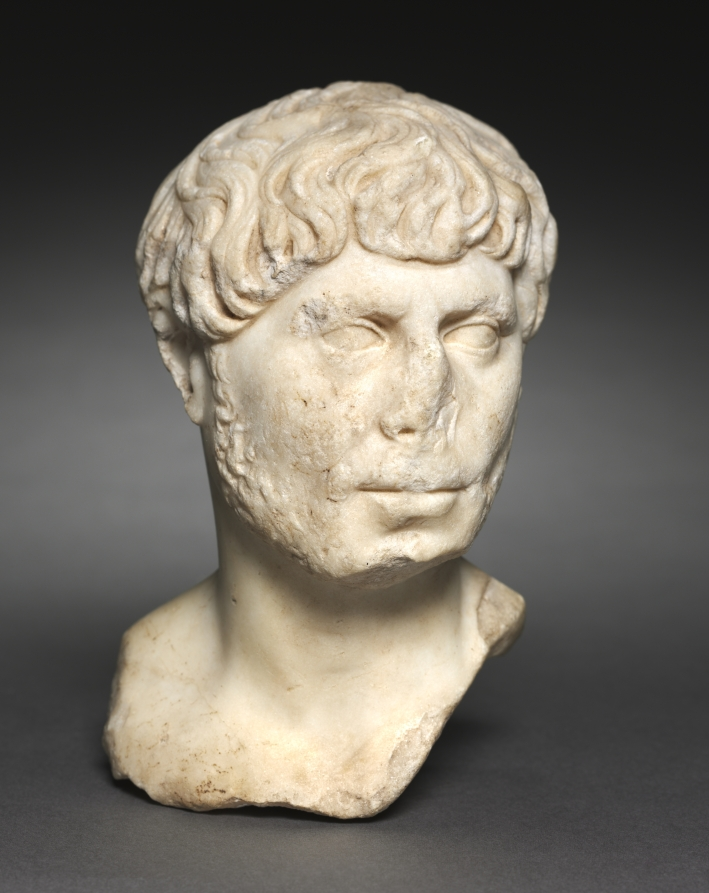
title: Head of a Bearded Man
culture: Italy, Roman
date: c. 125 CE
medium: marble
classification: Sculpture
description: This small-scale portrait depicts a bearded man turned toward his left. His close-cropped hair is combed forward in artful waves, echoed in his short beard. While parts of the chest and shoulders have been lost, the projecting element underneath suggests this portrait was intended as a bust. Beards were uncommon in Rome until the emperor Hadrian (r. 117–38 CE) popularized them during his reign. This man’s grooming is so similar to the emperor’s that he was first thought to be Hadrian; however, the face is too angular. Wealthy and noble Romans would often depict themselves with the same styles as the imperial family.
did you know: This head was probably originally displayed against a wall or in a niche.